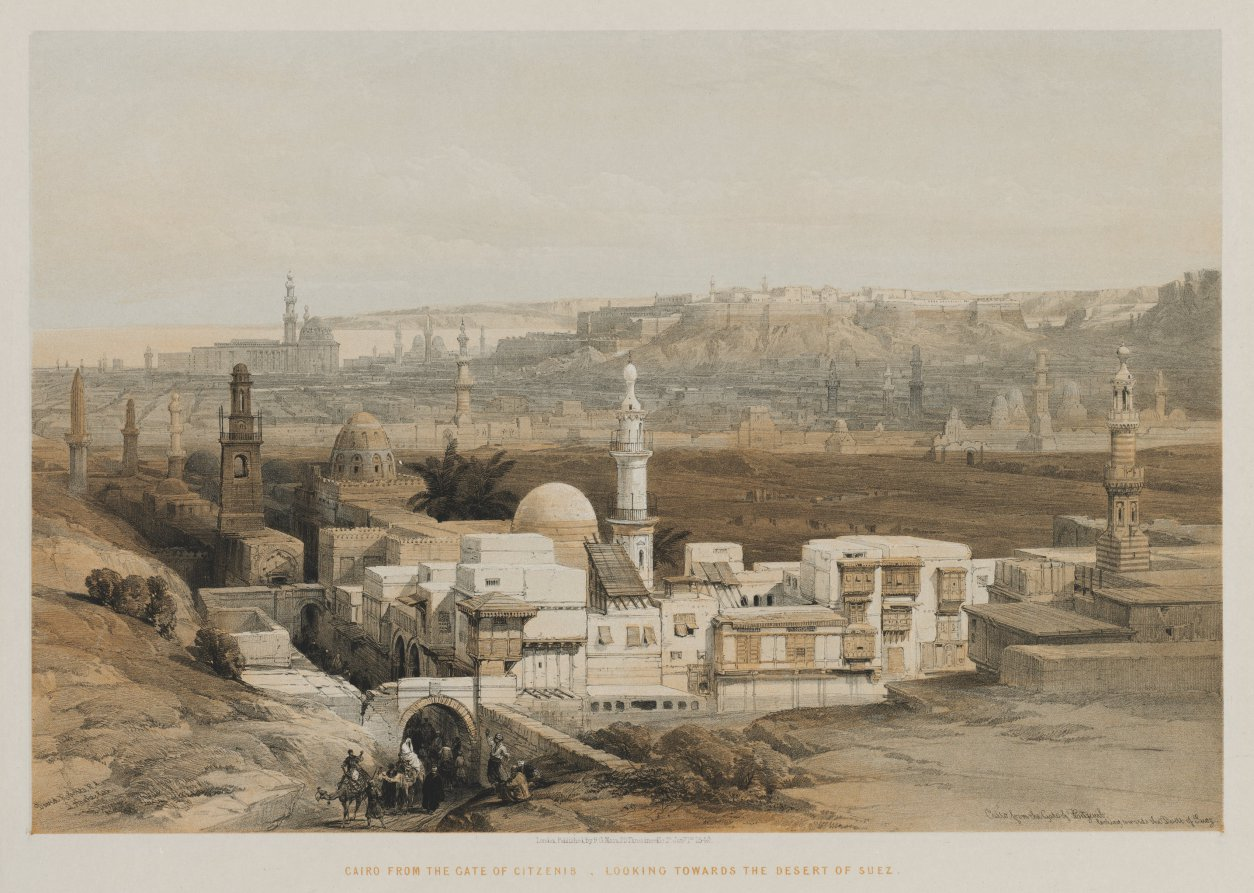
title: Egypt and Nubia, Volume III: Cairo from the Gate of Citzenib, Looking towards the Desert of Suez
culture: England, 19th century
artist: Louis Haghe (British, 1806–1885)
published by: F. G. Moon (British, 1797–1871)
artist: after David Roberts (Scottish, 1796–1864)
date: 1849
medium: color lithograph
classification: Print